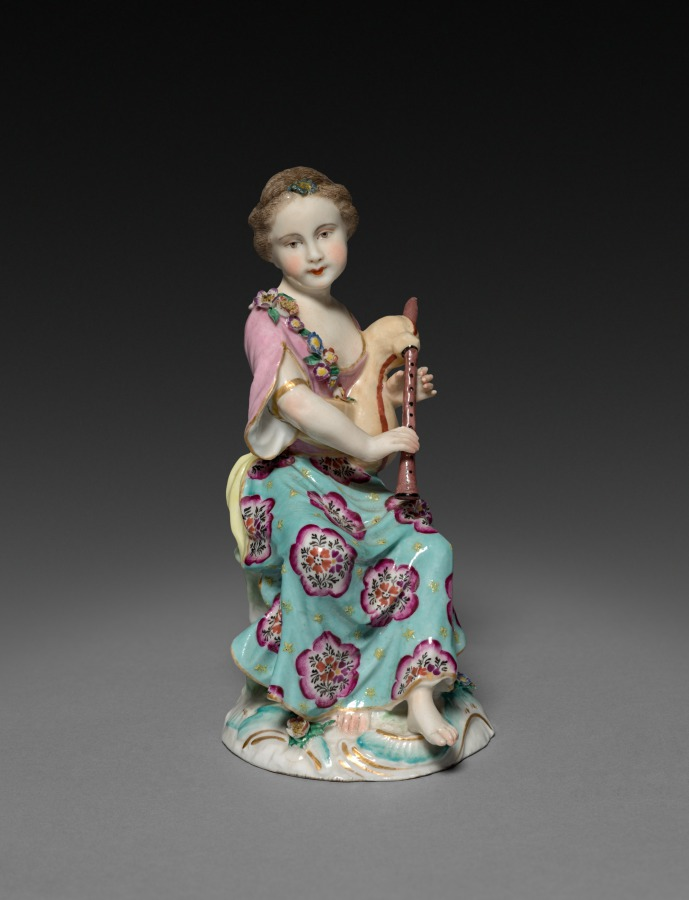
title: Girl Musician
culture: Germany, 18th century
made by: Frankenthal Porcelain Factory (German)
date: c. 1770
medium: porcelain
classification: Ceramic